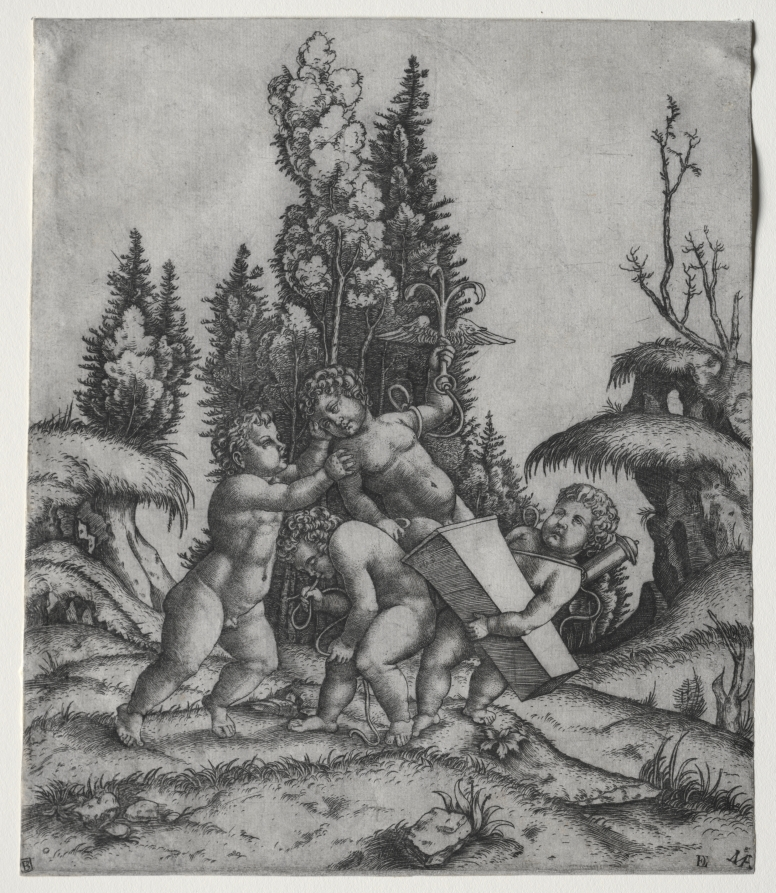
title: Cupid and three Putti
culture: Italy, 16th century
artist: Marcantonio Raimondi (Italian, 1470/82–1527/34)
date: 1506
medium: engraving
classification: Print